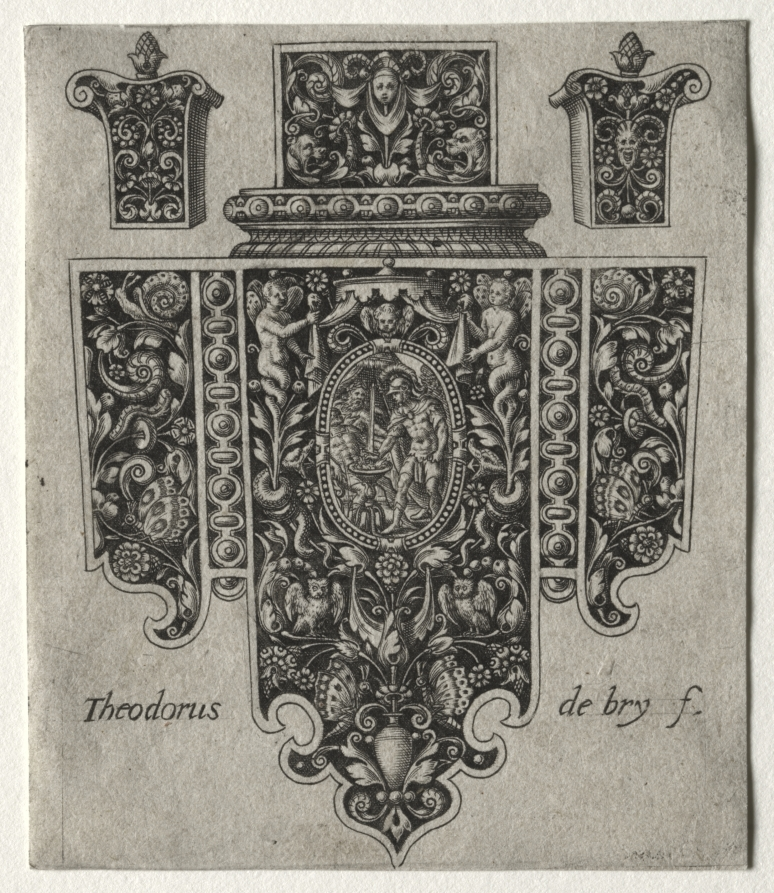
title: Pendant Ornament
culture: Flanders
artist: Theodor de Bry (Flemish, 1528–1598)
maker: after Georg Pencz (German, c. 1500–1550)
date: 1580–1600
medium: engraving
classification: Print